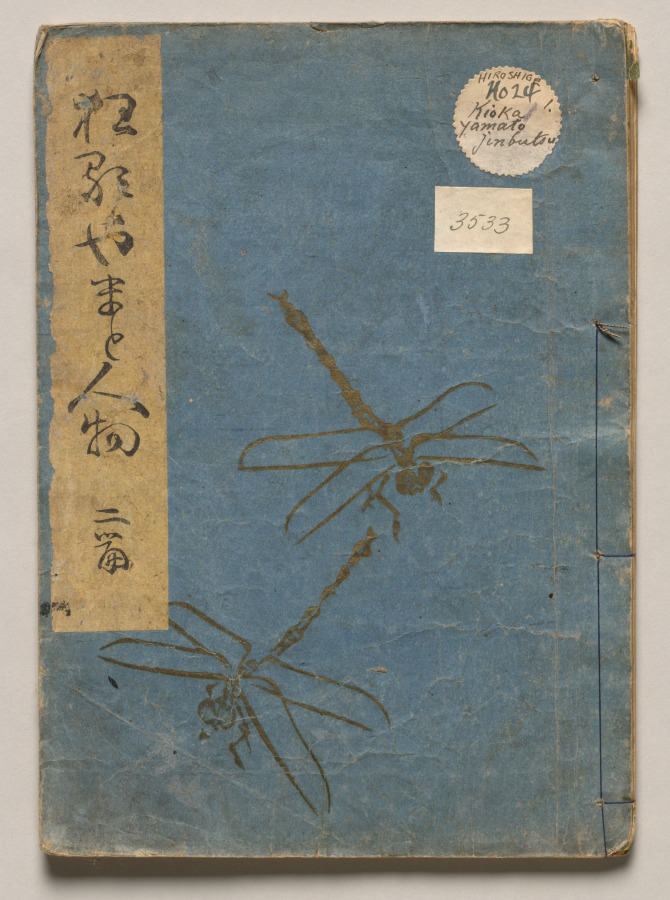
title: Volume Two of People of Japan in Light Verse (Kyōka)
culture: Japan, Edo period (1615–1868)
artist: Utagawa Hiroshige (Japanese, 1797–1858)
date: 1857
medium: Woodblock-printed book; ink and color on paper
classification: Bound Volume